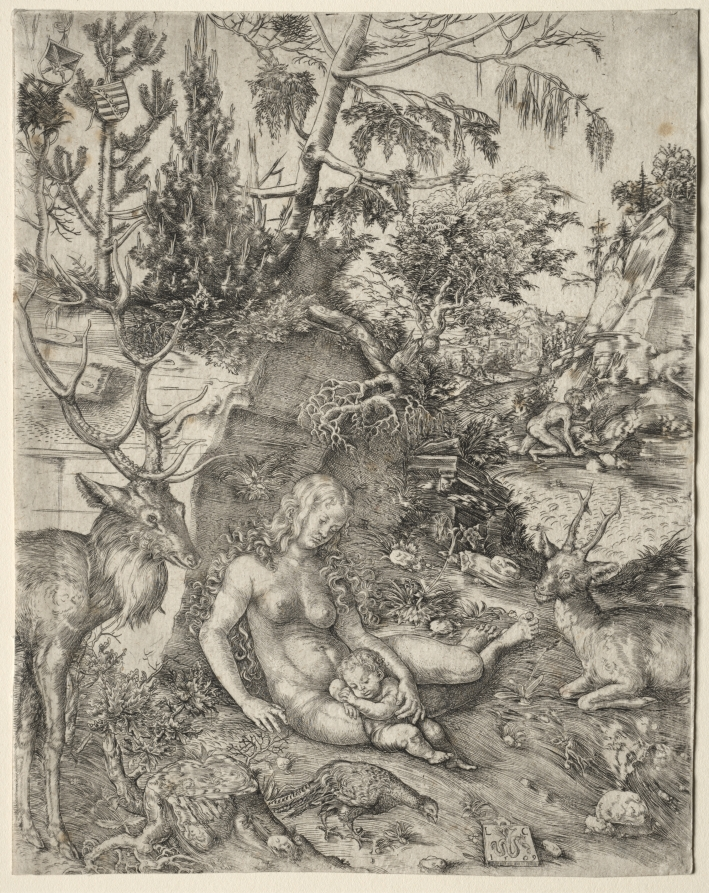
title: The Penance of St. John Chrysostom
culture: Germany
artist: Lucas Cranach (German, 1472–1553)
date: 1509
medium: engraving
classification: Print